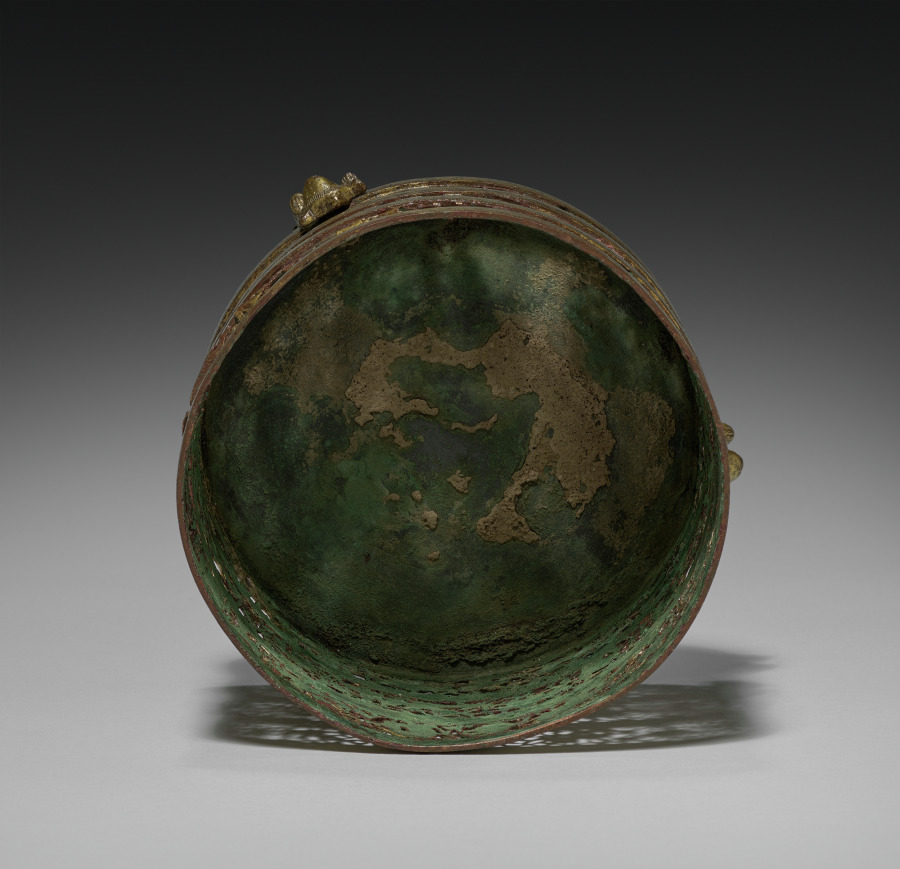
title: Cylindrical Container with Cover (Lian)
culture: China, Han dynasty (202 BCE–220 CE)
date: 100 BCE–100 CE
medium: gilt bronze with openwork and chased designs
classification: Metalwork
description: This magnificent gilded bronze vessel with openwork decoration shows all kinds of fabulous creatures, real and imaginary, chasing each other among swirling scrolls. There is an emphasis on the unbroken rhythms of movement, rather than the ferocity of animals in combat. Cylindrical bronze vessels in this shape, called lian, were often used as cosmetic boxes.